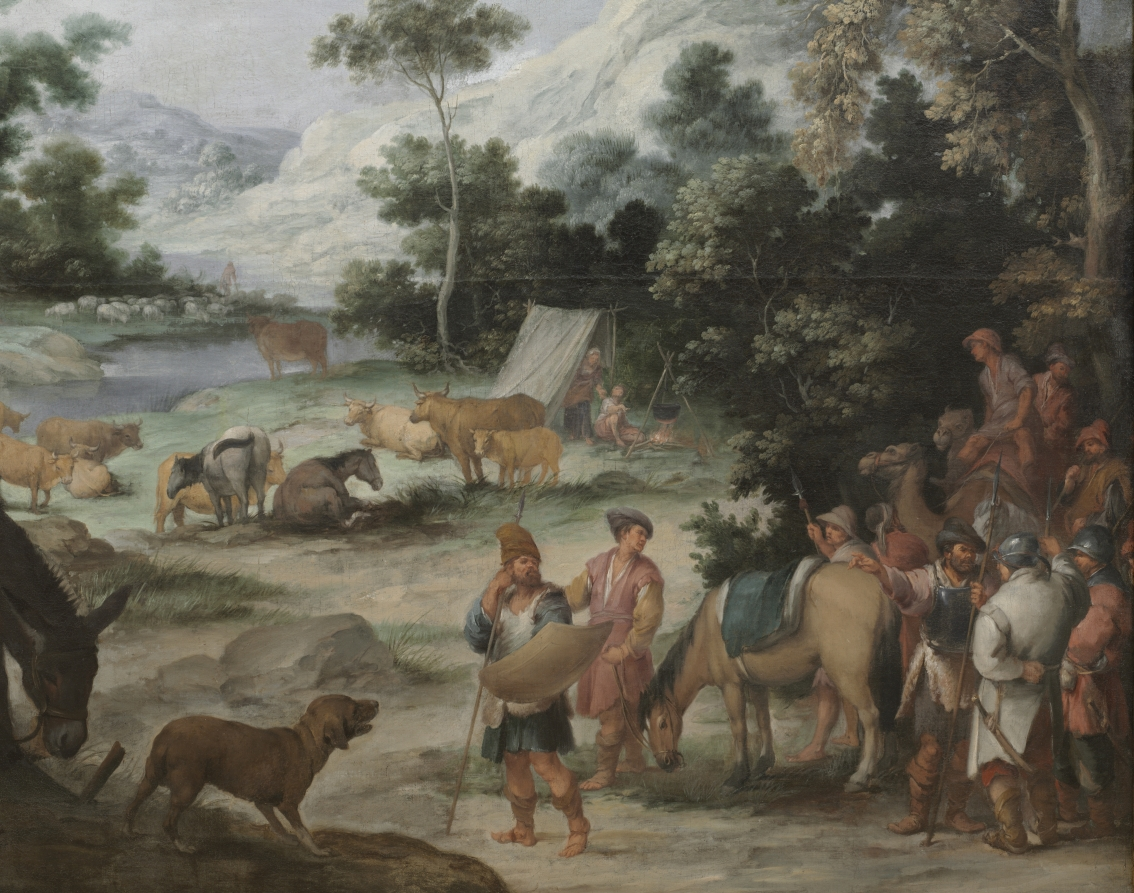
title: Laban Searching for His Stolen Household Gods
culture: Spain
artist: Bartolomé Esteban Murillo (Spanish, 1617–1682)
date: c. 1665–70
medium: oil on canvas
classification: Painting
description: This story comes from the Old Testament book of Genesis and stresses the value of reconciliation. Jacob lived with his uncle Laban for years, marrying Laban’s daughters Rachel and Leah. When the relationship between the men soured, Jacob and his family departed, while Rachel secretly stole her father’s household gods. When Laban discovered that the statues were missing, he pursued Jacob, accusing him of theft. Here, Jacob invites Laban to search his tent, while Rachel sits on the saddlebag containing the statues. After coming up empty-handed, Laban proposes a truce, ending the squabble.